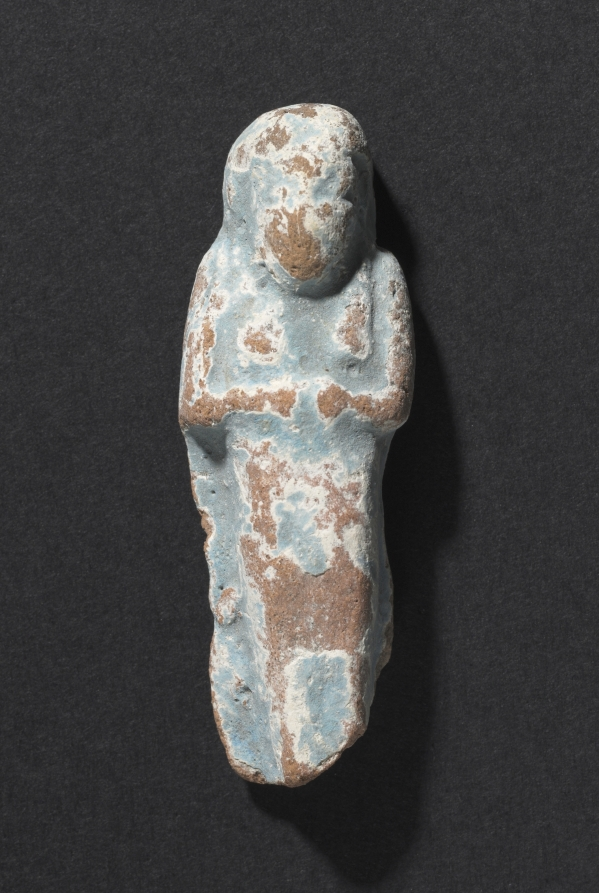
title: Shawabty of Ditamenpaankh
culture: Egypt, Late period (715–332 BCE), Dynasty 25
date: 715–656 BCE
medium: terracotta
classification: Funerary Equipment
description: High demand for shawabtys in the Late Period, a time when as many as 400 or more shawabtys were placed in the tomb with the deceased, gave rise to a specialized container for storing them: the shawabty box. This example is inscribed for the lady of the house, Ditamenpaankh, and was probably one of a pair originally made for her. The single-masted boat on the box's lid is perhaps an allusion to the pilgrimage of the deceased to the holy city of Abydos, the cult city of Osiris, king of the dead. The shawabtys inside are crude, mass-produced examples cast in an open mold. Made of terracotta, their blue paint imitates more costly shawabtys made of faience. As for the shawabty spell, it has been removed from its traditional location on the shawabty's front and relocated onto the sides of box, where it needed only to be written once, thus expediting production.